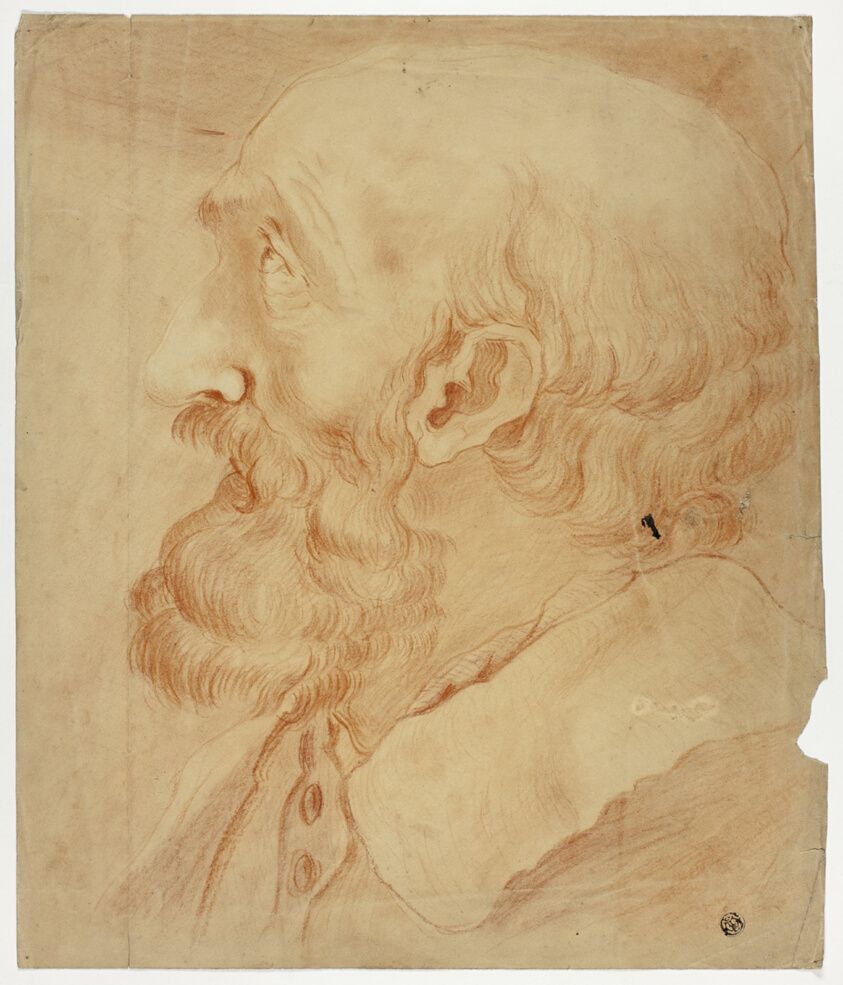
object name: Drawing and Watercolor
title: Head of Bearded Man in Profile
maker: Unknown Artist; European 19th century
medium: Red chalk with stumping on buff wove paper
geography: Europe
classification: chalk; paper; drawings (visual works); prints and drawing